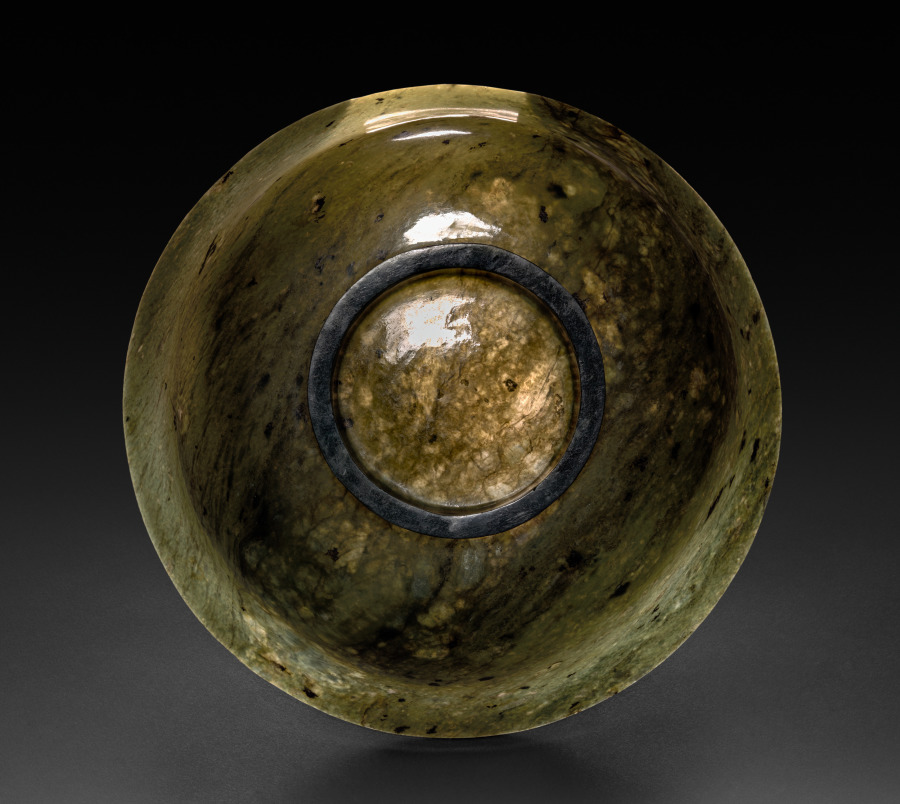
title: Bowl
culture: China, Qing dynasty (1644–1911), Qianlong reign (1736–95)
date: 1736–95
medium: spinach jade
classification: Jade